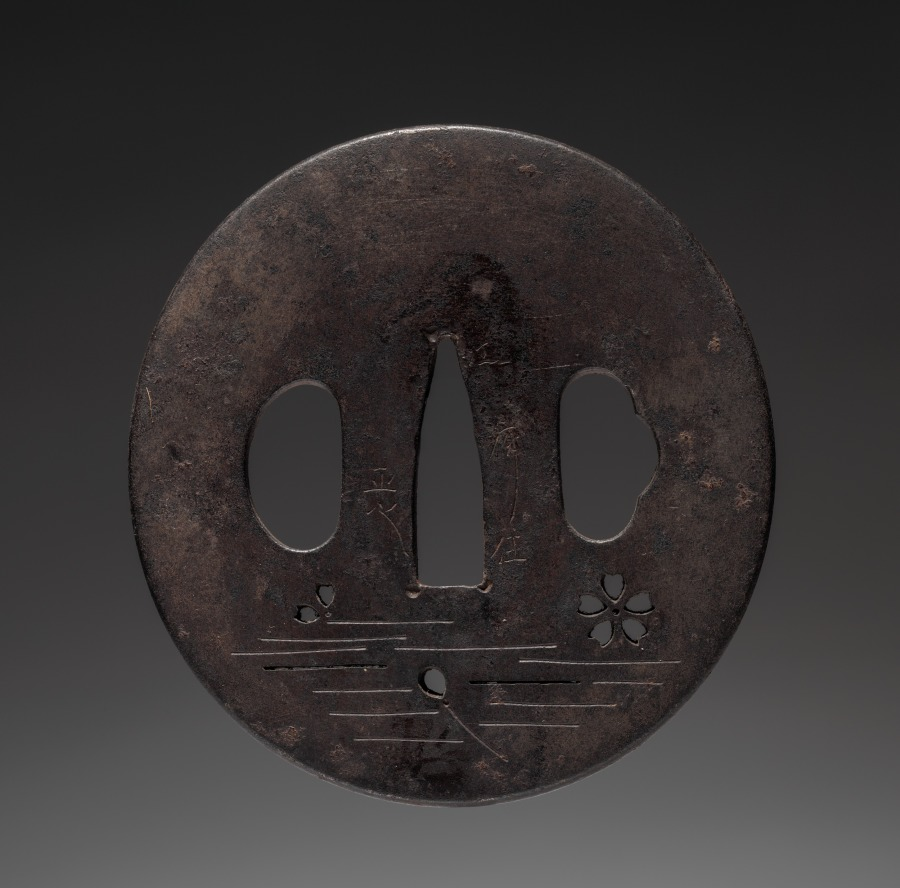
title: Sword Guard (Tsuba) with Cherry Blossoms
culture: Japan, Edo period (1615–1868)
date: mid-1800s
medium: iron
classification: Arms and Armor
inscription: signed "Masayuke, residing in Kofu [Edo]."